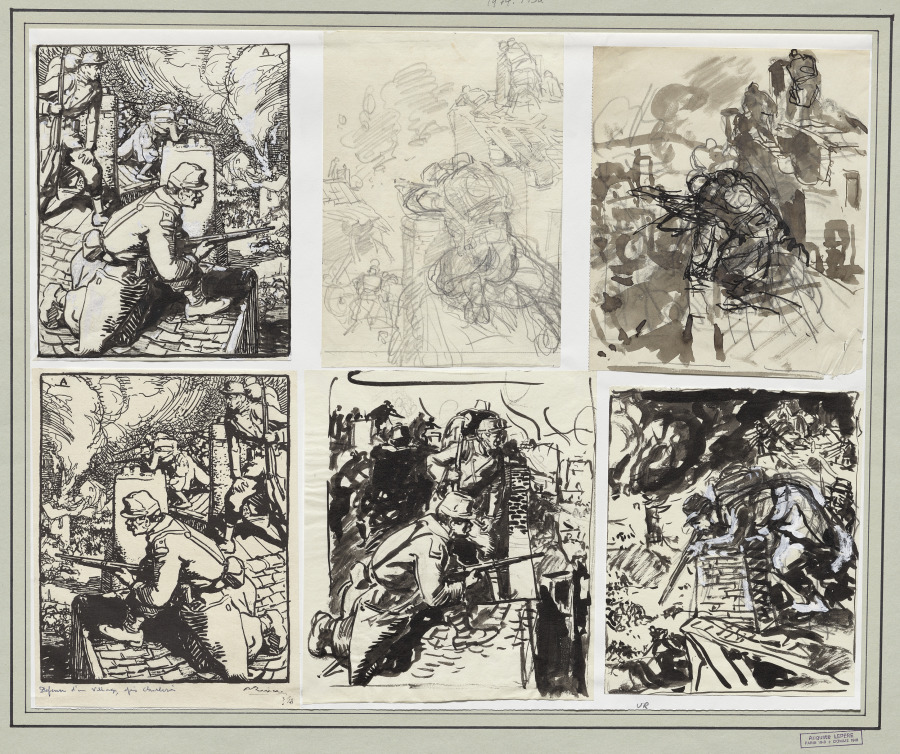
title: Défense d'un village après Charleroi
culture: France, 20th century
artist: Auguste Louis Lepère (French, 1849–1918)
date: 1914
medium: pen and black ink and wash and pencil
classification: Drawing